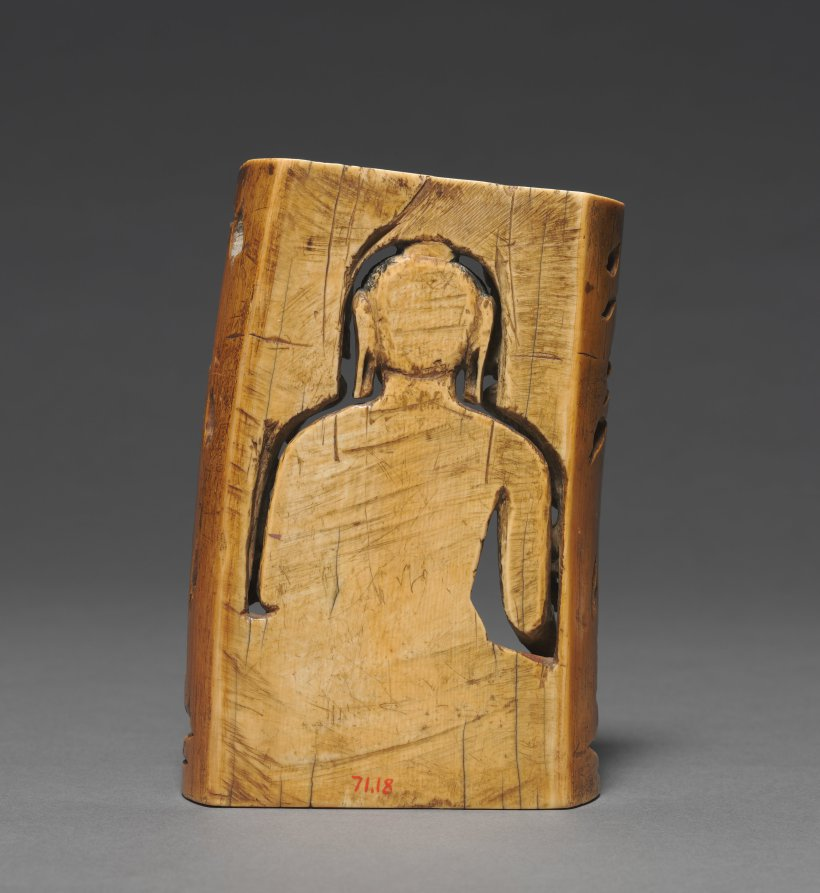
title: Temptation of Buddha by the Evil Forces of Mara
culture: Northern India, Kashmir, 8th century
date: 700s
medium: ivory with gold and polychrome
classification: Ivory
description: Intimate shrines for personal meditation practices contained scenes from the life of the Buddha. In an episode just prior to his achievement of enlightenment, the Buddha sat in meditation and faced personifications of the final obstacles. In this exquisite rendering derived from the Greco-Roman realism of Gandharan art, demons attack him in an attempt to scare him off the path. Seductive women do their best to distract him. He remains placid and firm in his conviction that these beings have no inherent reality, and he renders them powerless.